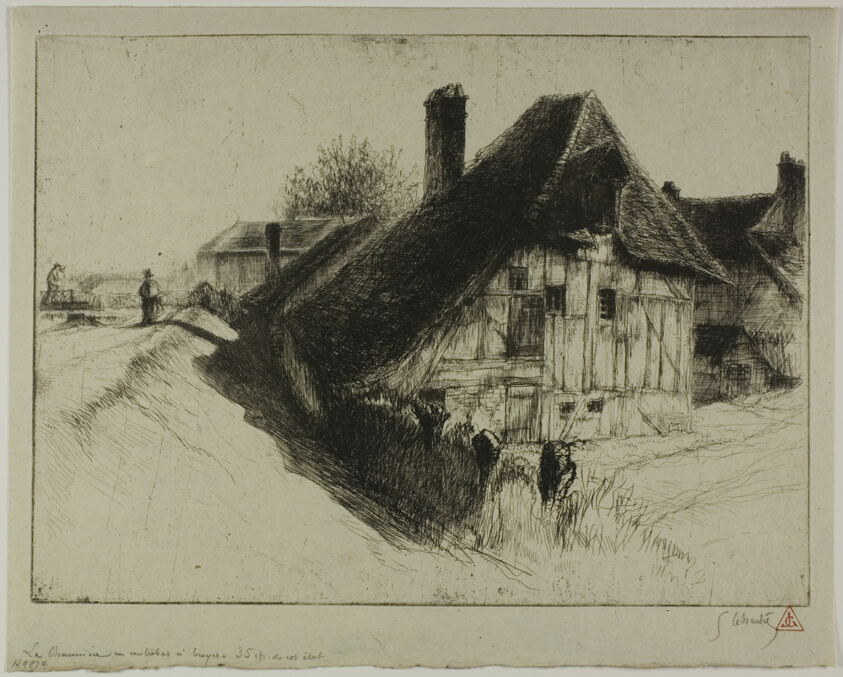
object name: Print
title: Low-Seated Peasant Dwelling, Troyes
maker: Gustave Leheutre (French, 1861-1932)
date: 1896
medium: Etching on ivory laid paper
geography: France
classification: etching; print; prints and drawing